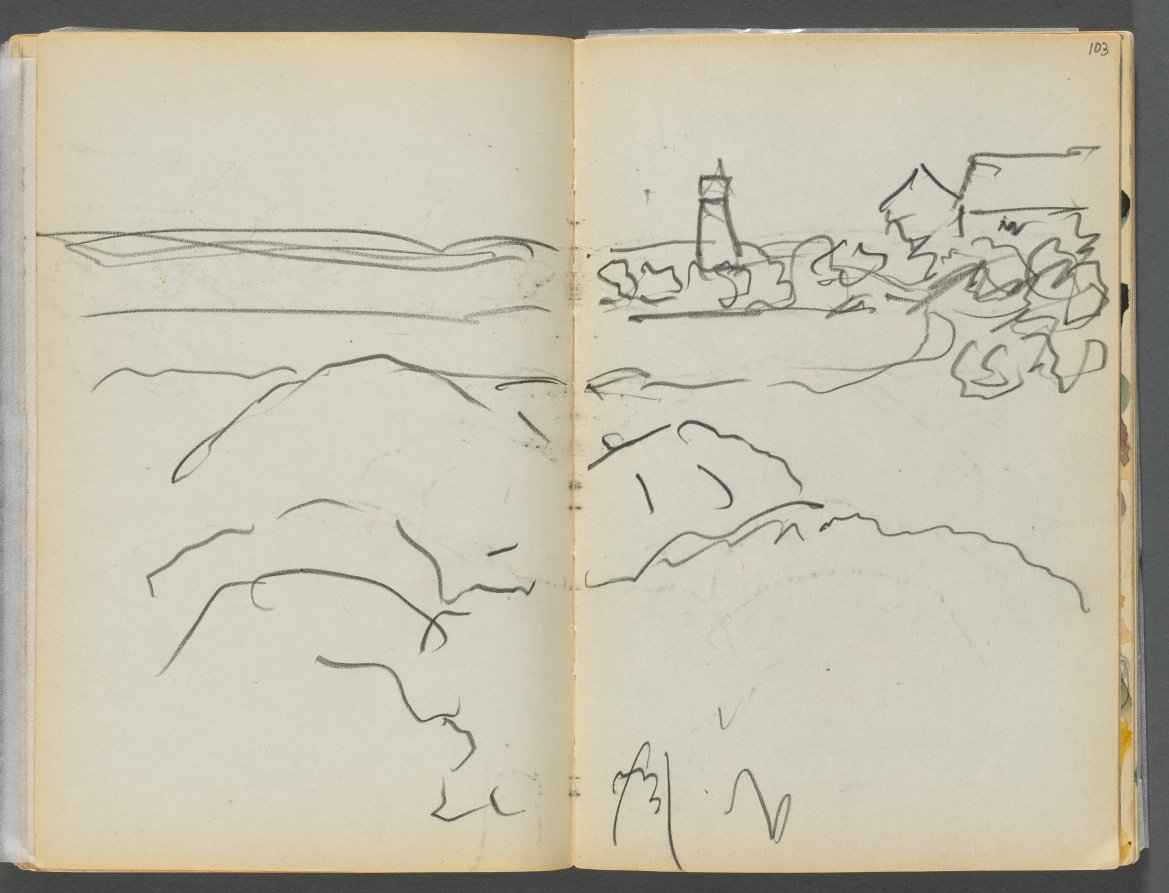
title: Sketchbook- The Granite Shore Hotel, Rockport, page 102 & 103: Harbor View with Lighthouse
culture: America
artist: Maurice Prendergast (American, born Newfoundland [now Canada], 1858–1924)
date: 1905–10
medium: graphite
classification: Bound Volume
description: This sketchbook contains 72 pages of pencil drawings and 9 watercolors of Cape Ann. On the inside of the cover Prendergast wrote the address of the Granite Shore Hotel in Rockport, Massachusetts.